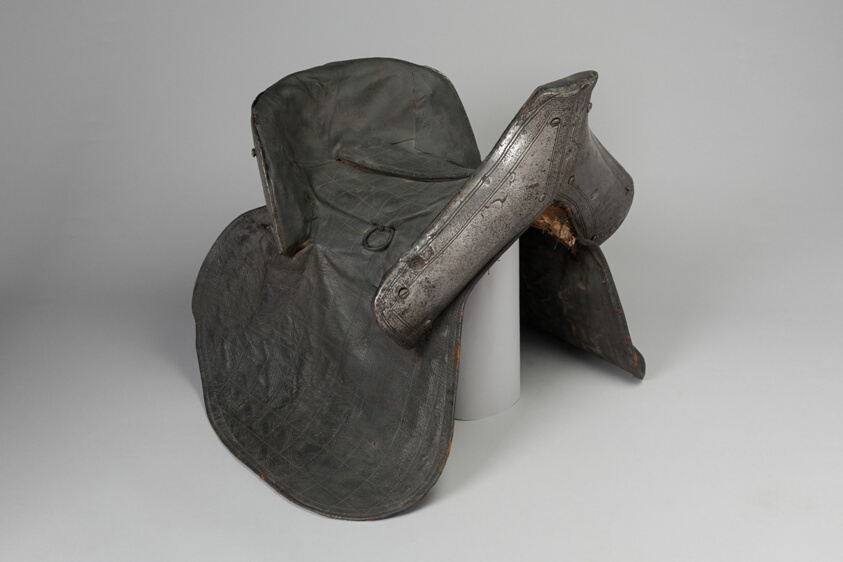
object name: Armor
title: Armored Saddle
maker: Italian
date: early 17th century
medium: Wood, leather, canvas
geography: France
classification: horse equipment; armor; arms and armor